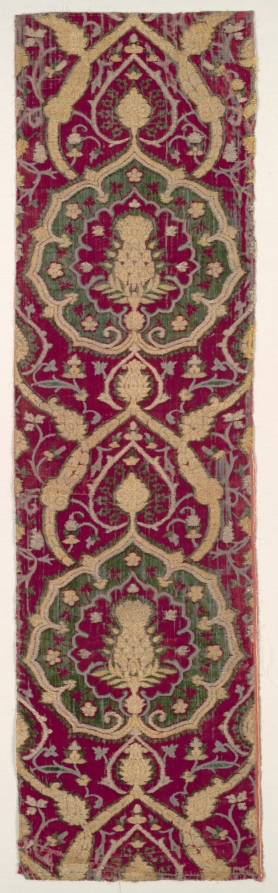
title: Brocaded Velvet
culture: Turkey, early 16th Century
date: c. 1500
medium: velvet: silk, brocaded with gold and silver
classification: Velvet